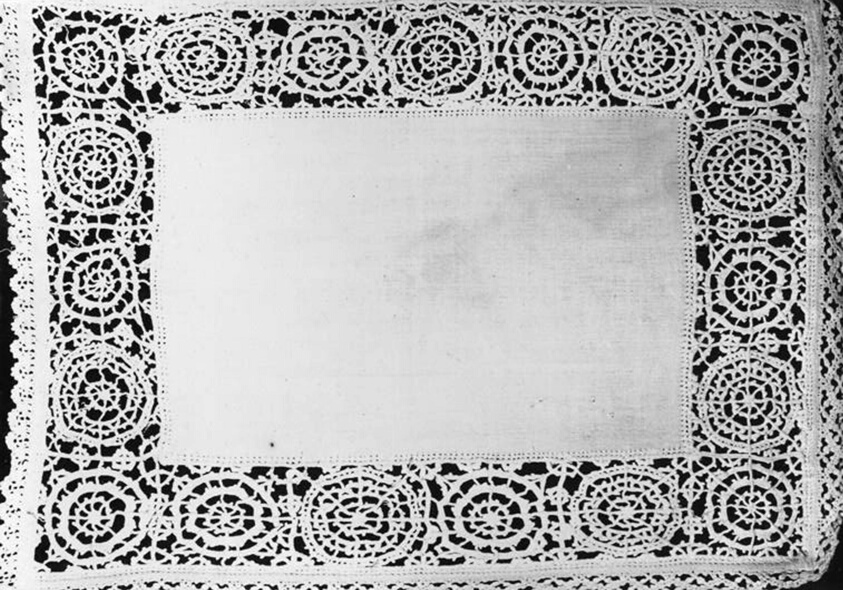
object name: Textile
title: Pillow Cover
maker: Italy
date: 19th century (revival lace)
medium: Linen, plain weave; needle lace work on a cut and drawn thread work grid; embroidered in double hem and overcast stitches; edged in bobbin straight lace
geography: Italy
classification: textile; lace - mixed